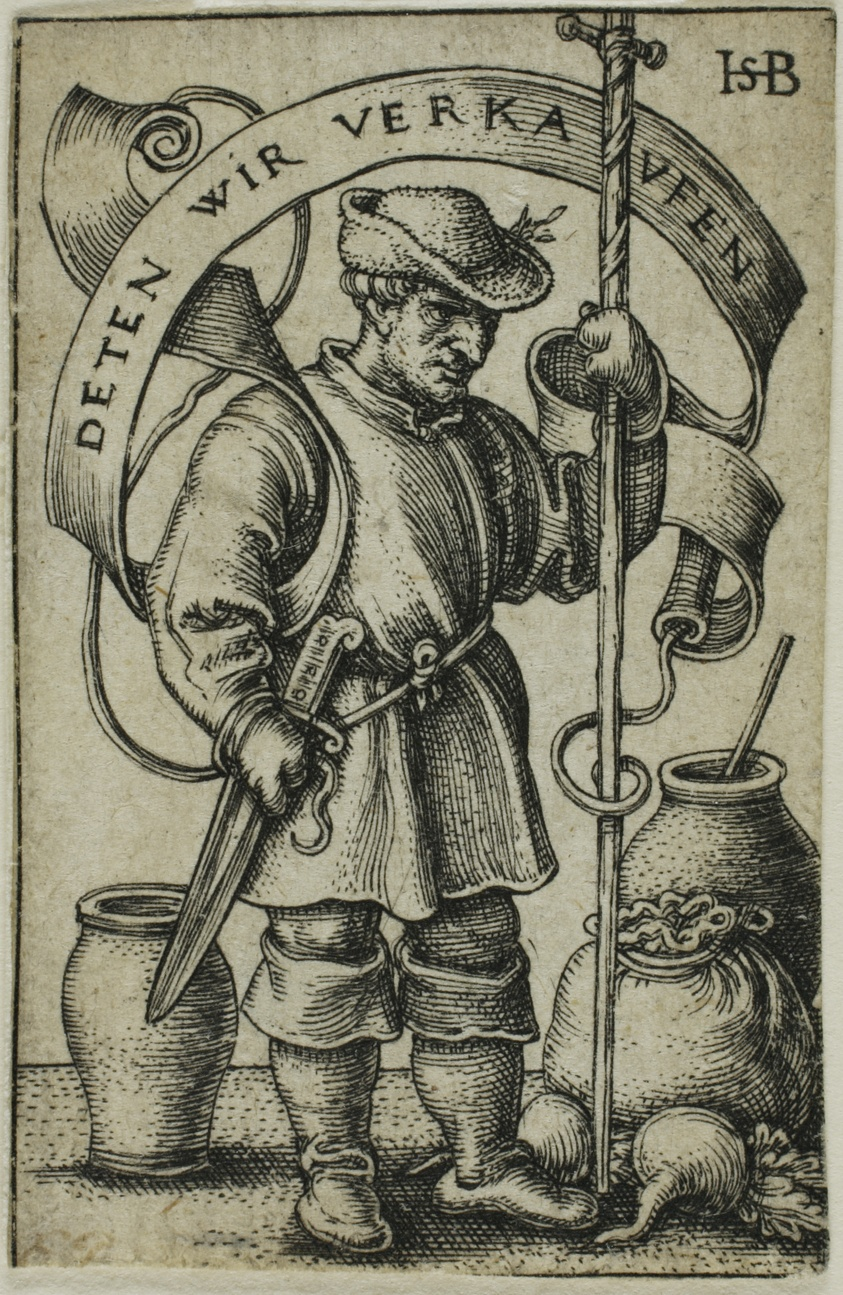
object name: Print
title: The Market Peasant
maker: Sebald Beham; German, 1500-1550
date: c. 1542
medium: Engraving in black on ivory laid paper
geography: Germany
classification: engraving; print; prints and drawing